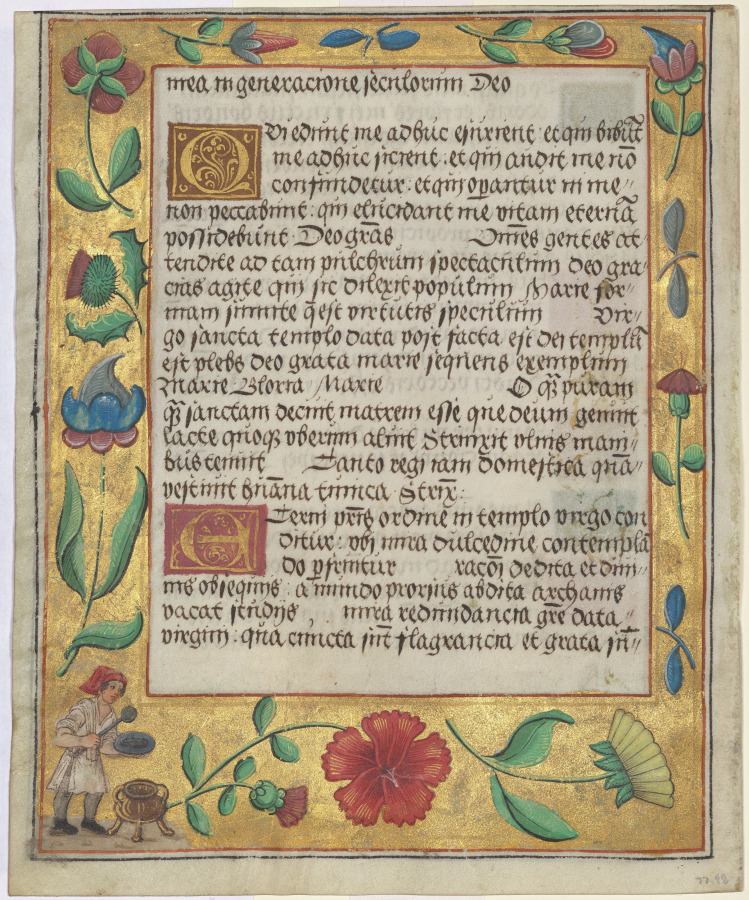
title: Leaf from a Psalter and Prayerbook: Ornamental Border with Carnations, a Thistle, and a Cook Ladling Soup (verso)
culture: Germany, Hildesheim(?), 16th century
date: c. 1524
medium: ink, tempera and liquid gold on vellum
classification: Manuscript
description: This leaf and others from the collection were excised from the same prayer book. They reveal the charm of secular decoration such as satyrs or domestic activities like cooking. Such details would have been a sumptuous delight to the original owner. The original book was a highly personalized volume apparently written and illuminated in North Germany as suggested by internal textual references. The prominent inclusion of Saint Godehard (died 1038), Bishop of Hildesheim, in the calendar (not visible) would suggest that the manuscript was produced in that city.